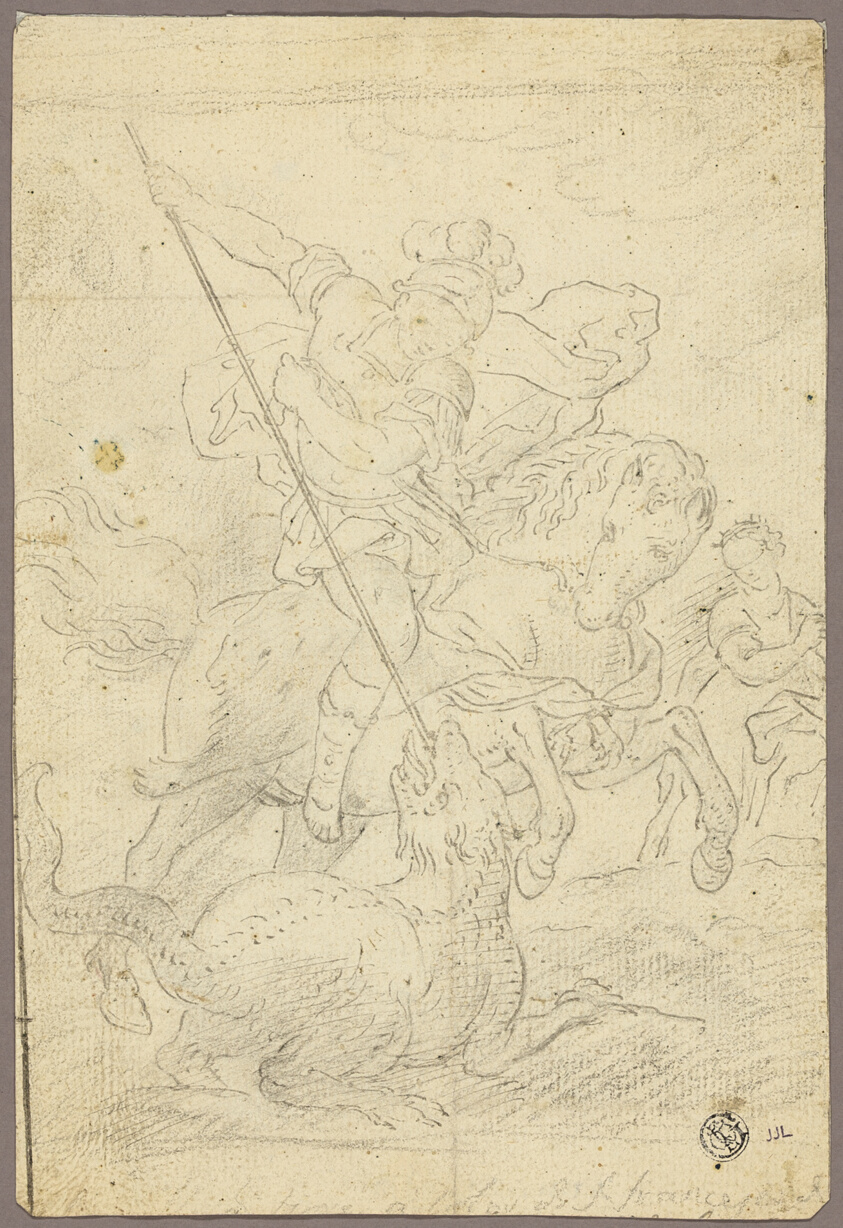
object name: Drawing and Watercolor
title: St. George and the Dragon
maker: School or imitator of Raffaello Sanzio, called Raphael; Italian, 1483-1520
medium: Pen and gray wash, with touches of black chalk, on cream laid paper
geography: Italy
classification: ink or chalk wash; drawings (visual works); prints and drawing